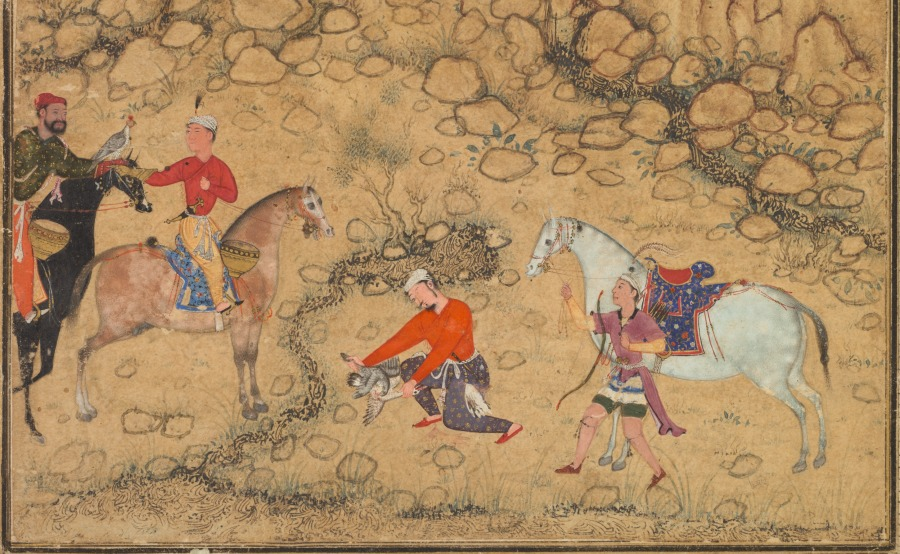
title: Hunting with falcons in a landscape (recto)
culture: Mughal India, court of Akbar (reigned 1556–1605)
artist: attributed to Abd al-Samad (Persian, c. 1510–1600)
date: c. 1558–60; borders added probably 1700s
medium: Gum tempera, ink, and gold on paper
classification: Painting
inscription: Inscription in upper right in nasta‘liq script, probably during the 1700s: the work of Mir Sayyid Ali, the illustrator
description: Mughal princes hunted on horseback with falcons. The hunting party would ride out into the wild and flush the prey from the brush. Then, its hood removed, the falcon would chase the prey and bring it down. This important work is thought to have been painted by one of the Persian artists Akbar’s father brought to India from Iran shortly after his arrival in India. The delicacy of the diminutive figures and the gently modeled rocks of the arid landscape contrast to the boldly dynamic paintings made by Indian artists.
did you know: The hunter’s glove is on the ground, as he pulls his falcon off the duck.